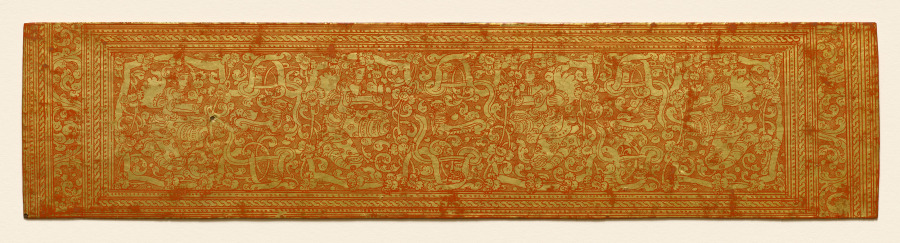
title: Illumination, folio 1 (recto) from a Kammavacha: Buddhist ordination text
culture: Myanmar (Burma)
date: 1800s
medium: Leaf: lacquer and gilding on cloth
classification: Manuscript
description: In premodern Burma, lay people commissioned lavishly ornamented manuscripts for ceremonial occasions, when officiants would read aloud from the text. Written in black lacquer, the text is in the language of Pali written in a Burmese script. It contains ordination rites and procedures for monastic ceremonies. The second to last page is covered with intricately drawn, winged celestial beings (nats) in gestures of praise. They fly amid intertwining vegetation—denoting bounty—that grows from serpentine forms that refer to rain clouds. Lionlike forms inhabit the space with them. The top and bottom covers are equally ornamented with jeweled floral patterning.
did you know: The Pali text of this manuscript is written in Burmese square script, which is also known as "tamarind seed script."